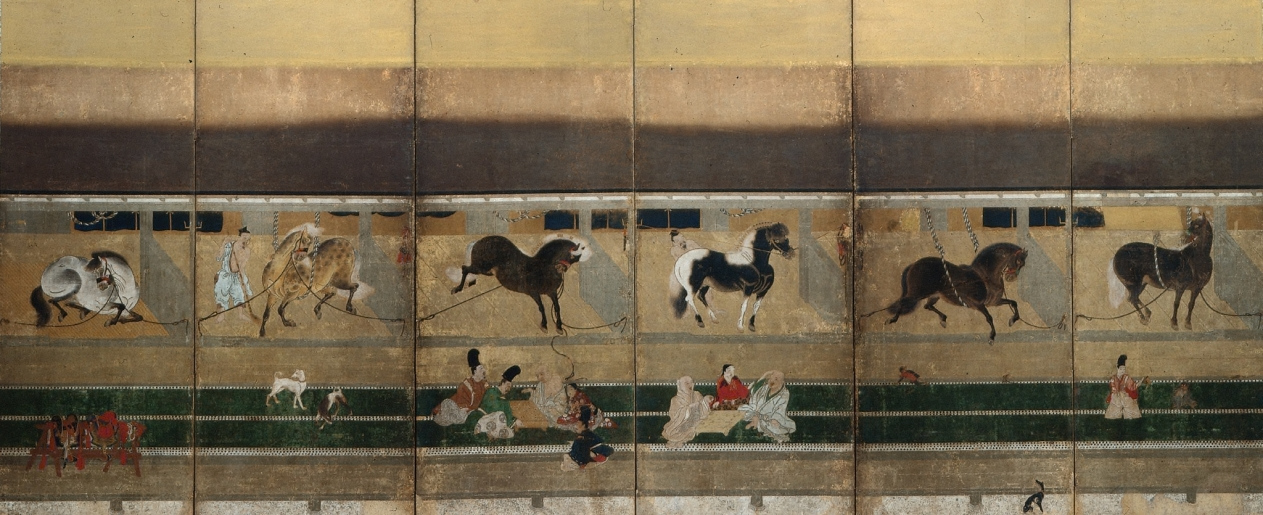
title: Horse Stable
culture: Japan, Muromachi period (1392–1573)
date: early 1500s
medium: One of a pair of six-panel folding screens; ink, color, and gold on paper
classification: Painting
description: Prized horses in stables may be the main theme of the pair of screens of which this screen is a part, but a lot of action is happening on the veranda. Falconry is the focus of this screen, and a lively atmosphere develops in the interplay of the dynamic horses and the birds of prey.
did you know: This is the earliest surviving example of the "horse stable" theme in Japanese screens.